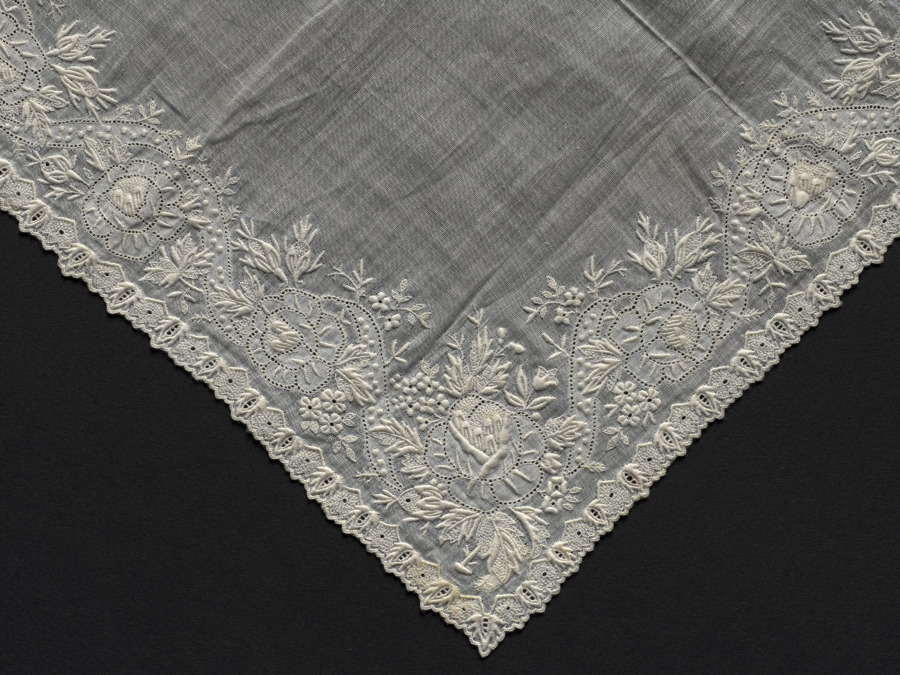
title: Handkerchief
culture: Flanders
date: 1800s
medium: Plain weave linen: embroidered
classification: Embroidery